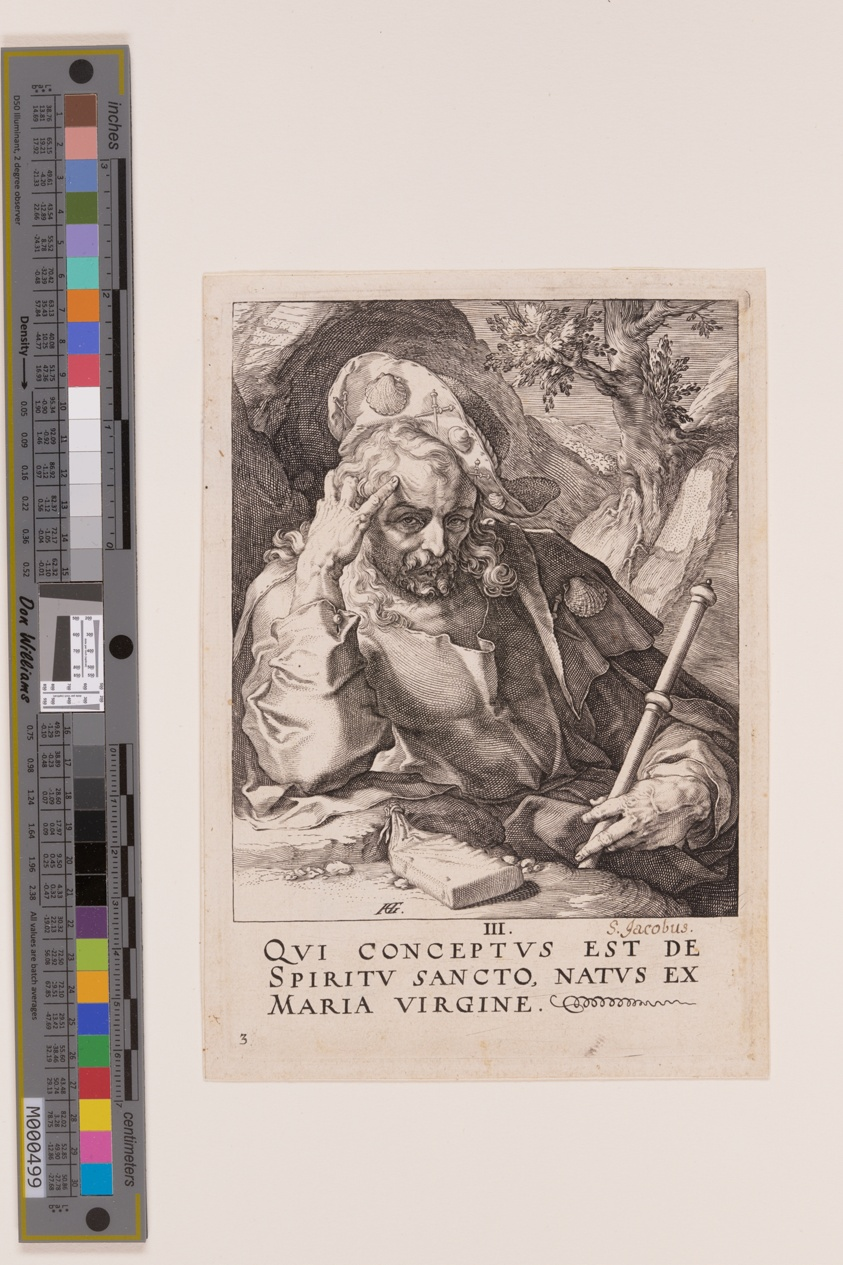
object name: Print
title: St James the Great, from Christ, the Apostles and St Paul with the Creed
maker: Hendrick Goltzius (Dutch, 1558–1617)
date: 1589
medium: Engraving on ivory laid paper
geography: Netherlands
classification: engraving; paper; print; prints and drawing